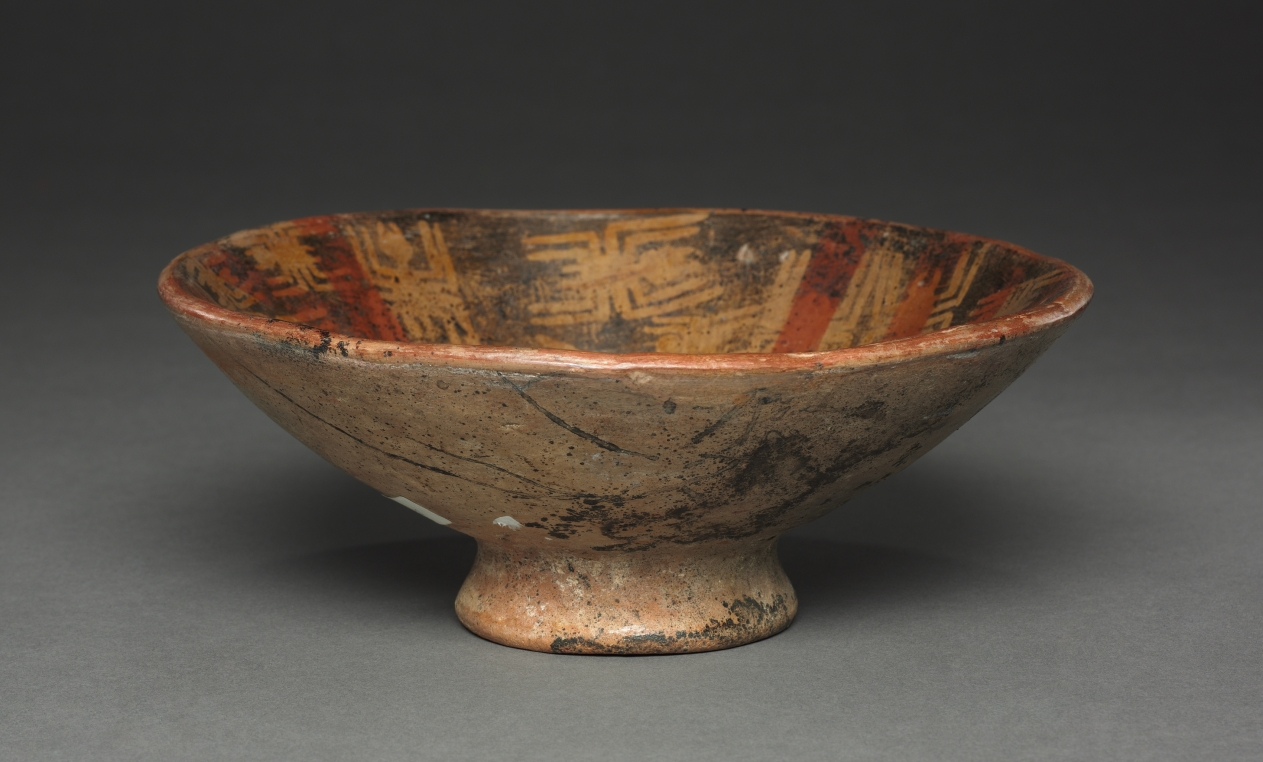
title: Bowl with Spider Decoration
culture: Colombia, Highland Nariño region, Piartal style, 8th-13th Century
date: c. 750–1250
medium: ceramic, slip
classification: Ceramic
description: In the Nariño region of southwestern Colombia, the dead were buried in shaft tombs, the most elaborate up to sixty feet deep and furnished with offerings such as these bowls. Colombian ceramics are not much studied and little can be said about their imagery, which reveals a keen interest in geometric abstraction. Depicted here are a row of figures with thatch-roofed huts, humans attacked by birds, and spiders.